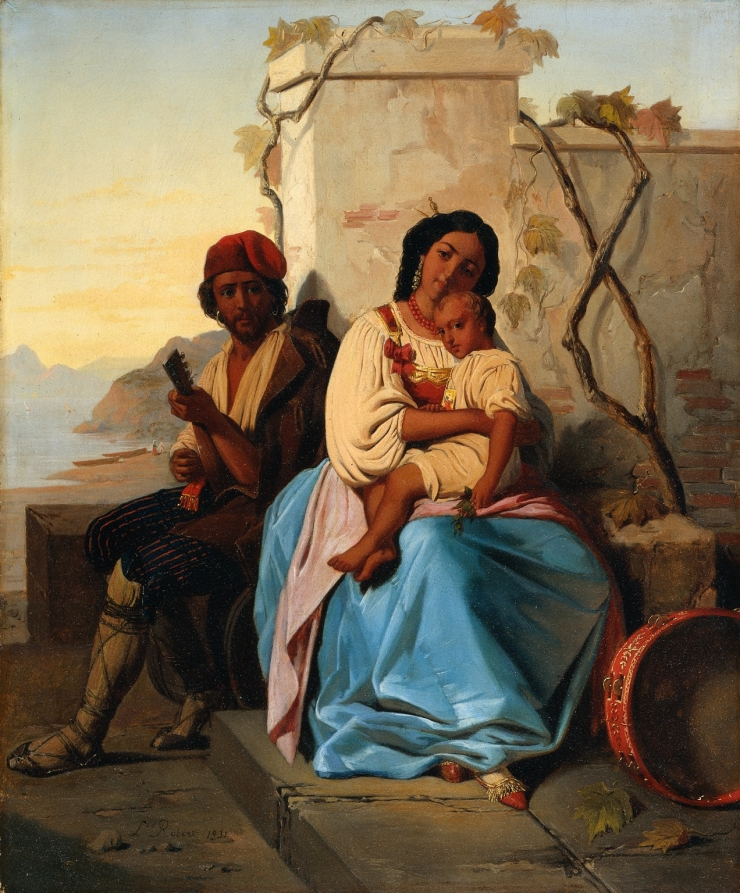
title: Italian Scene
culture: Switzerland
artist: imitator of Léopold Robert (Swiss, 1794–1835)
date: not dated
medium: oil on fabric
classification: Painting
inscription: Signed and dated lower left: Lld Robert 1831